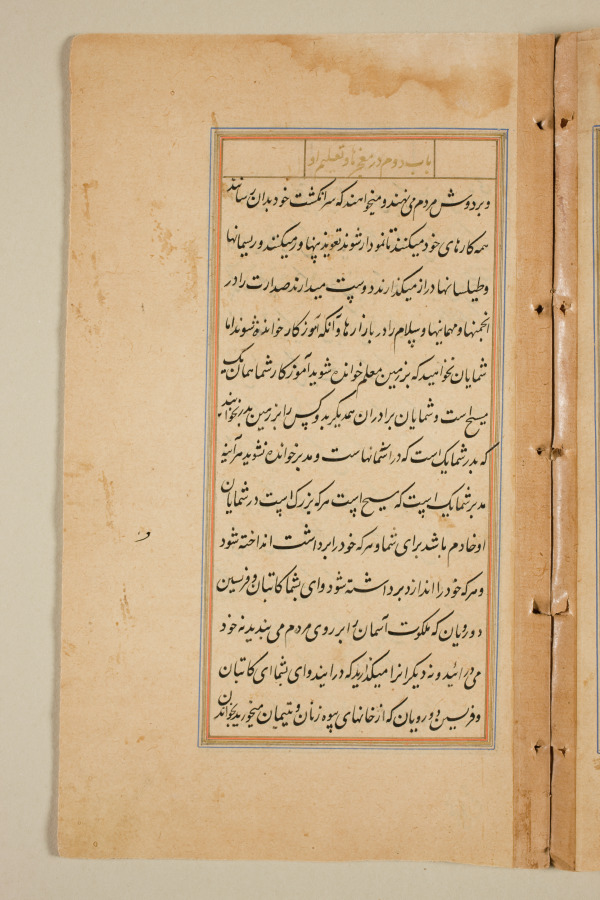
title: Text page from a Mirror of Holiness (Mir’at al-quds) of Father Jerome Xavier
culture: Mughal India, Allahabad, made for Prince Salim (1569–1627)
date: 1602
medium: Ink and gold on paper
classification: Manuscript